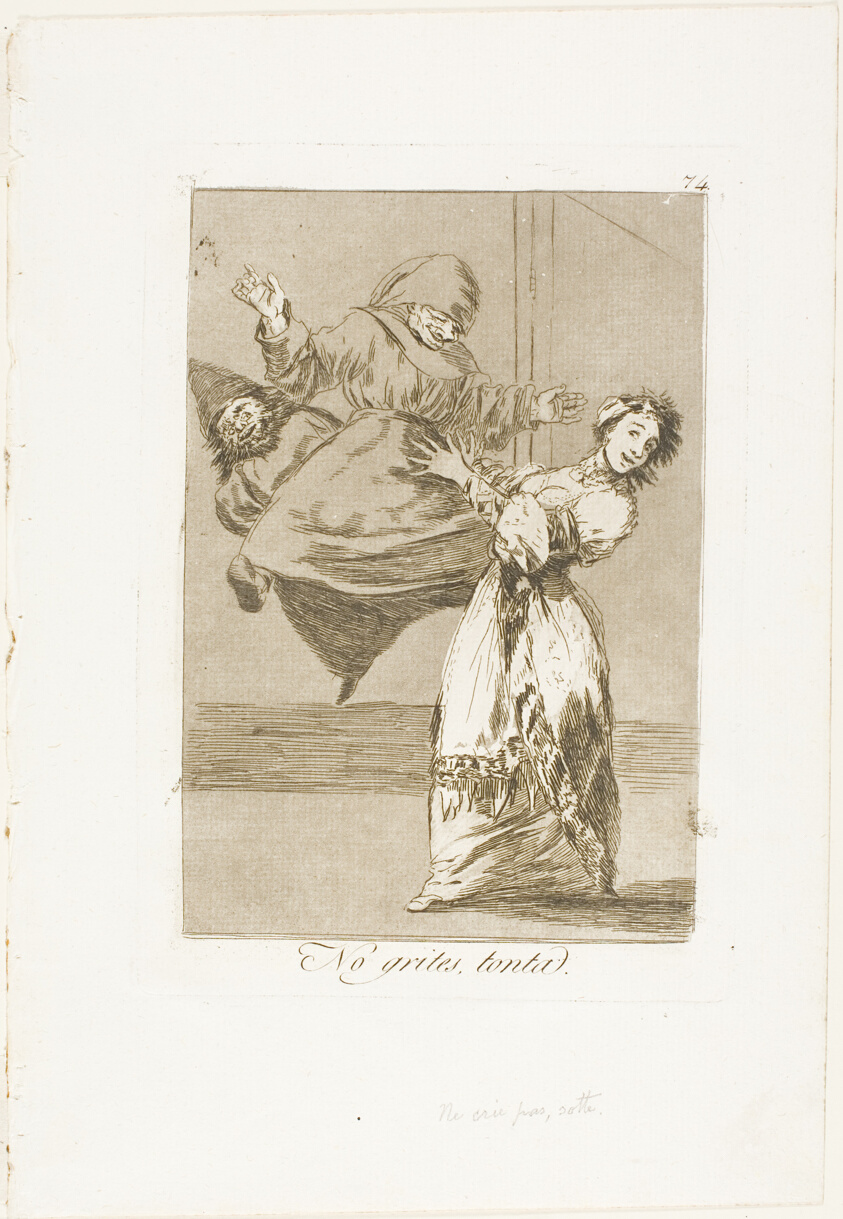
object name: Print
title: Don't scream, stupid, plate 74 from Los Caprichos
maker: Francisco José de Goya y Lucientes (Spanish, 1746-1828)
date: 1797/99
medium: Etching and aquatint on ivory laid paper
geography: Spain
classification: etching; print; prints and drawing